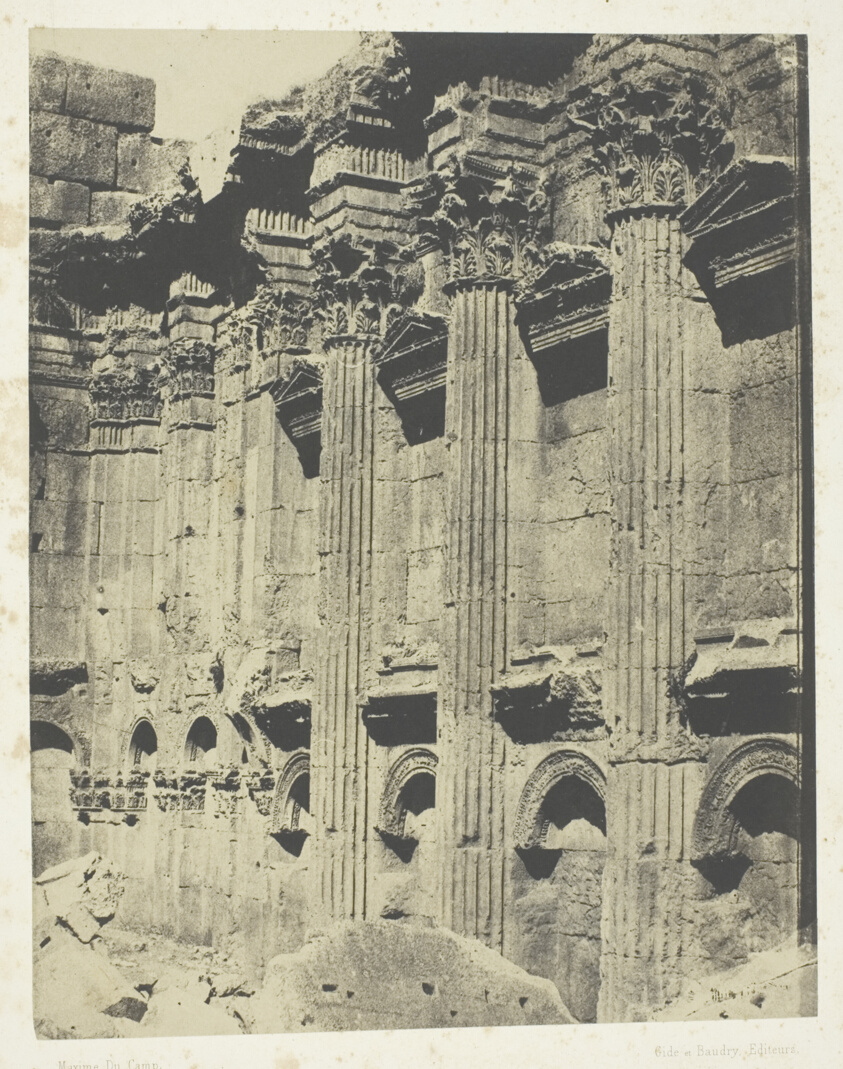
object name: Photograph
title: Temple De Jupiter à Baalbeck (Héliopolis, Intérieur Du Naos; Syrie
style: 19th century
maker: Maxime Du Camp (French, 1822–1894); printed by the Imprimerie Photographique de Blanquart-Evrard (French, founded 1851)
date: 1849/51, printed 1852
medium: Salted paper print, plate 125 from the album "Egypte, Nubie, Palestine et Syrie" (1852)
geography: France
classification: salted paper print; photographic process; photography; photograph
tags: Collected by Hugh Edwards, Egypte, Nubie, Palestine et Syrie